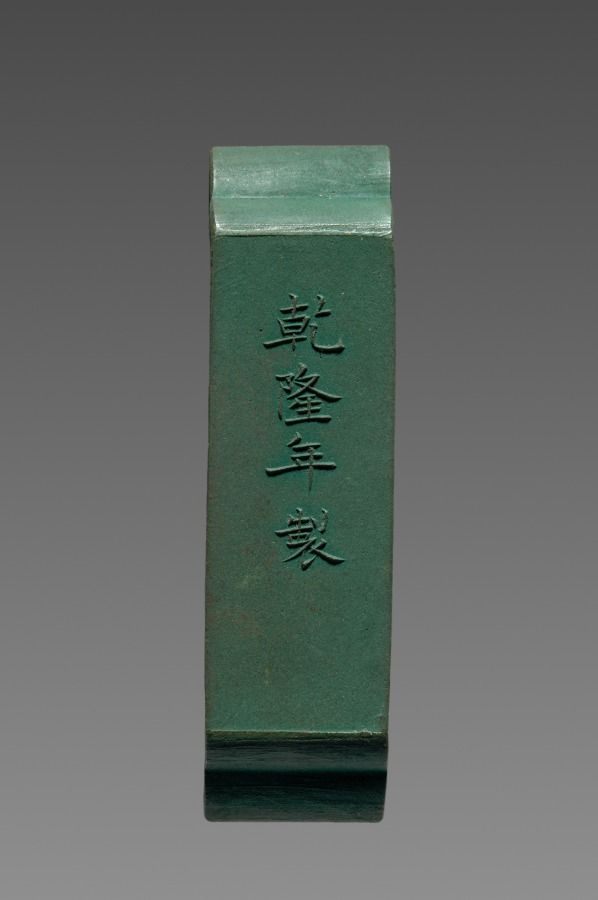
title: Ink Stick from an Imperially Commissioned Set of Ink Stick with Images and Poems of Famous West Lake Sites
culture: China, Qing dynasty (1644–1911), Qianlong reign (1736–95)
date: 1780–94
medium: Molded ink in green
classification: Miscellaneous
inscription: 乾隆年製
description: This is one of ten ink cakes of different shapes and colors stored in an exquisite lacquer box. Each is inscribed in gold with a poem by the Qianlong emperor, praising the ten famous sights of the Westlake in Hangzhou, near Shanghai. The Westlake is famous for its natural beauty; it was a favorite imperial destination and remains a tourist attraction today. Ink cakes (also called ink sticks) are dissolved with the addition of water and ground on the surface of a flat stone into liquid ink for painting and calligraphy. The precious ink cakes here, however, have never been used.